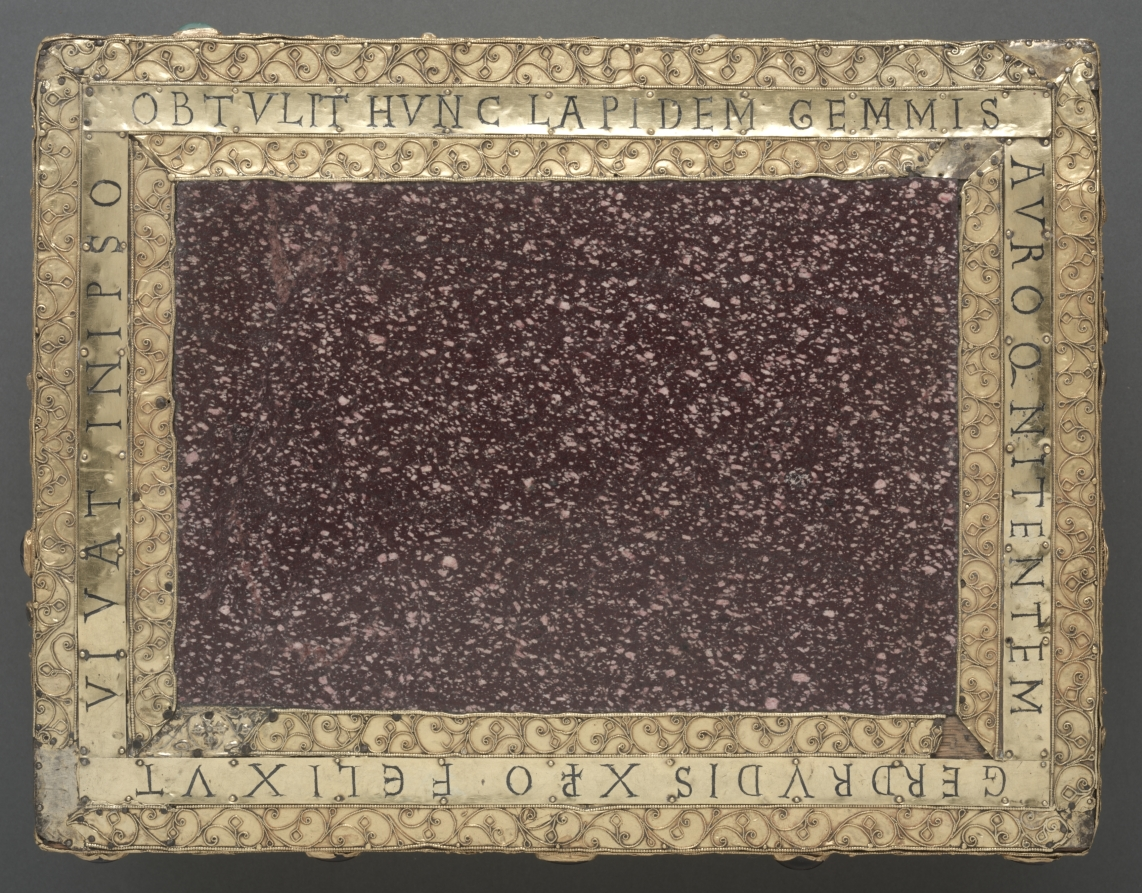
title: Portable Altar of Countess Gertrude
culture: Germany, Lower Saxony?, Romanesque period, 11th century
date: c. 1045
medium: gold, cloisonné enamel, porphyry, gems, pearls, niello, wood core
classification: Metalwork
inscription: GERDRVDIS XPO FELIX VT | VIVAT IN IPSO OBTVLIT HVNC LAPIDEM GEMMIS | AVROQ NITENTEM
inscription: SIGISMVNDVS, CONSTANTIVS, SANCTA CRVX, SCA ELENA, SCA ADALHEIT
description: Commissioned by Countess Gertrude of Brunswick, this portable altar is one of the Guelph Treasure’s earliest and most sumptuous objects. The choice of white-speckled porphyry as the altar stone signals Gertrude’s worldly aspirations; an imperial color since classical antiquity, porphyry was only used by the imperial family. Historical figures of royal and imperial rank are depicted with Christ, the Virgin, apostles, and archangels along the altar’s sides, stressing the countess’s political ambitions and claim of imperial lineage for her own dynasty. The Latin inscription surrounding the altar stone reads, "Gertrude offers to Christ, to live joyfully in him, this stone that glistens with gems and gold."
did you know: On the bottom of this altar is a trap door that opened to reveal small relics of saints wrapped in silk.